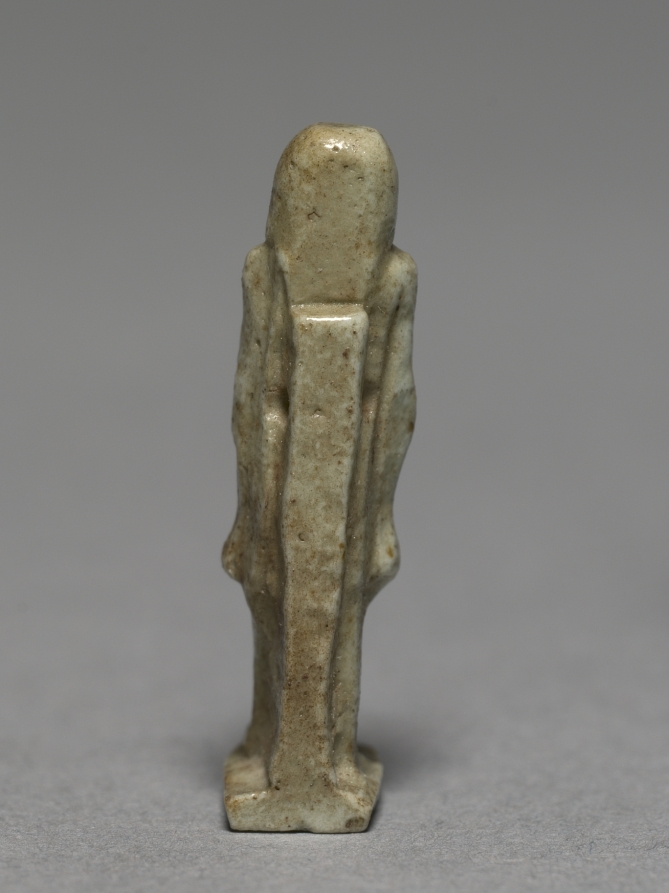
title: Amulet of Thoth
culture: Egypt, Late period (715–332 BCE), Dynasty 30–Greco-Roman period (332 BCE–395 CE), Ptolemaic dynasty (305–30 BCE)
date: 305–30 BCE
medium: gray green faience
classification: Amulets